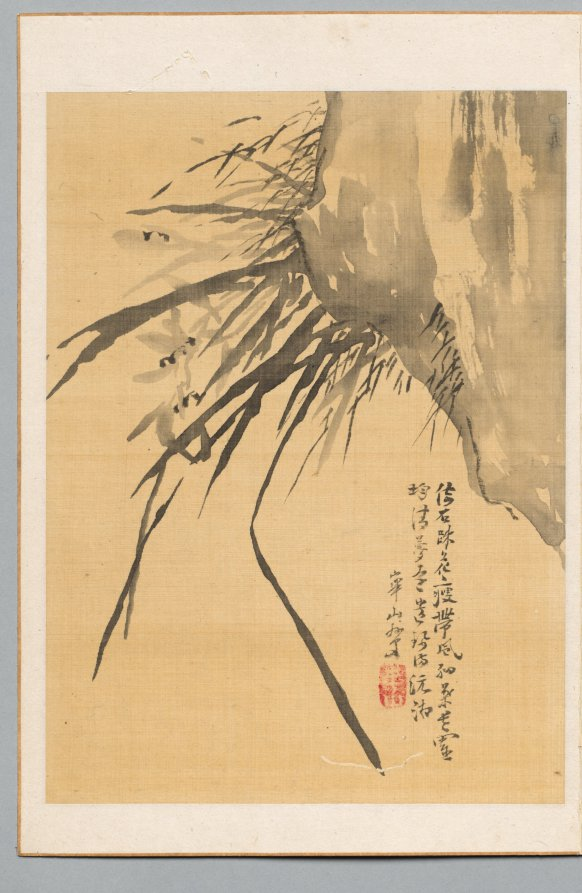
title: Orchid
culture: Japan, Edo period (1615–1868)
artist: Watanabe Kazan (Japanese, 1793–1841)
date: early to mid-1800s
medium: leaf from a pair of folding albums; ink and light color on paper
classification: Portfolio